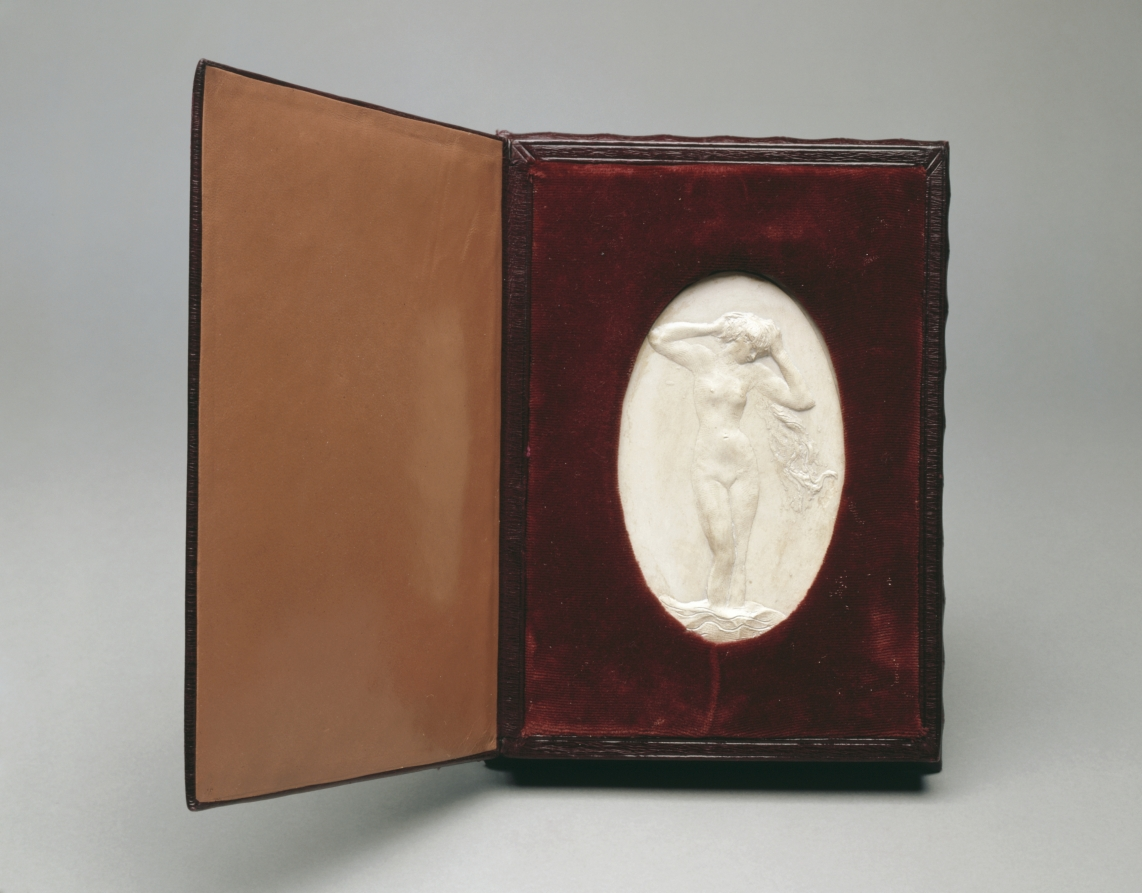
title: Vénus Astarté (Semitic goddess of fertility and love)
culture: France, early 20th Century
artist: Auguste Rodin (French, 1840–1917)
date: c. 1900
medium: plaster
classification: Sculpture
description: This relief of a female nude standing in water may represent the only time the great French sculptor Auguste Rodin provided an ornament for a precious object: a gold and enamel hand mirror designed by Felix Bracquemond (1833–1914). The mirror—acquired by the museum in 1978—was made for Baron Joseph Vitta, one of Rodin's most important patrons during the years around 1900, and it was probably for this reason that the artist agreed to the commission. This plaster cast of Rodin's nude was an intermediate version of the subject. Although the images on the mirror and the plaster cast were clearly derived from the same mold, there are significant differences in the figure's hair. Rodin probably changed the wax version (from which the gold relief of the mirror was made by lost-wax casting) before he used it.